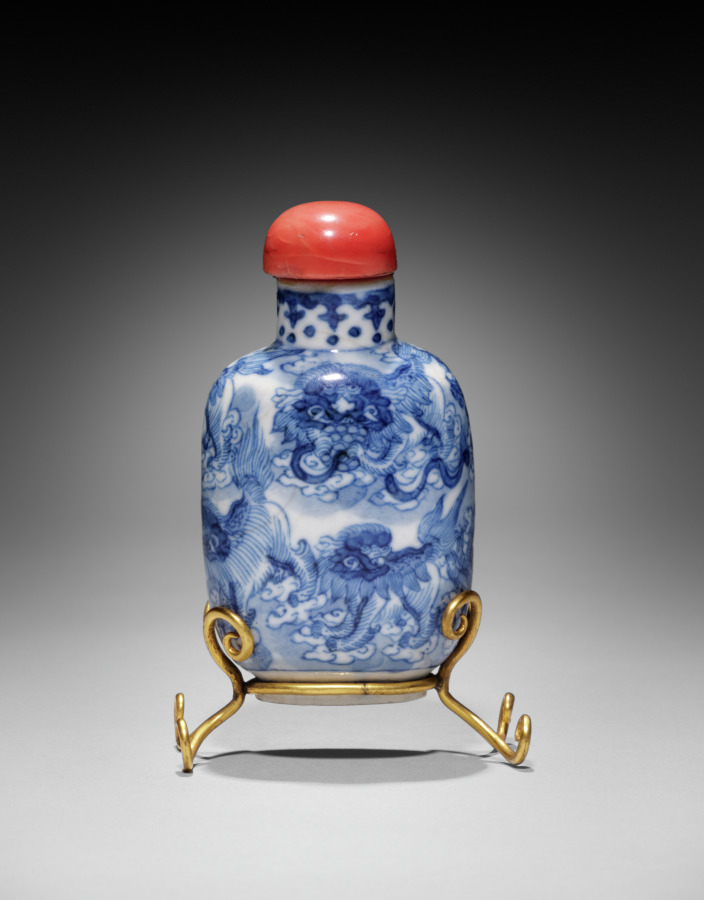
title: Flattened Ovoid Snuff Bottle with Stopper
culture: China, Jiangxi province, Jingdezhen kilns, Ming dynasty (1368-1644), Wanli reign (1572-1620)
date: 1573–1620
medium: porcelain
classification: Ceramic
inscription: 萬曆年製